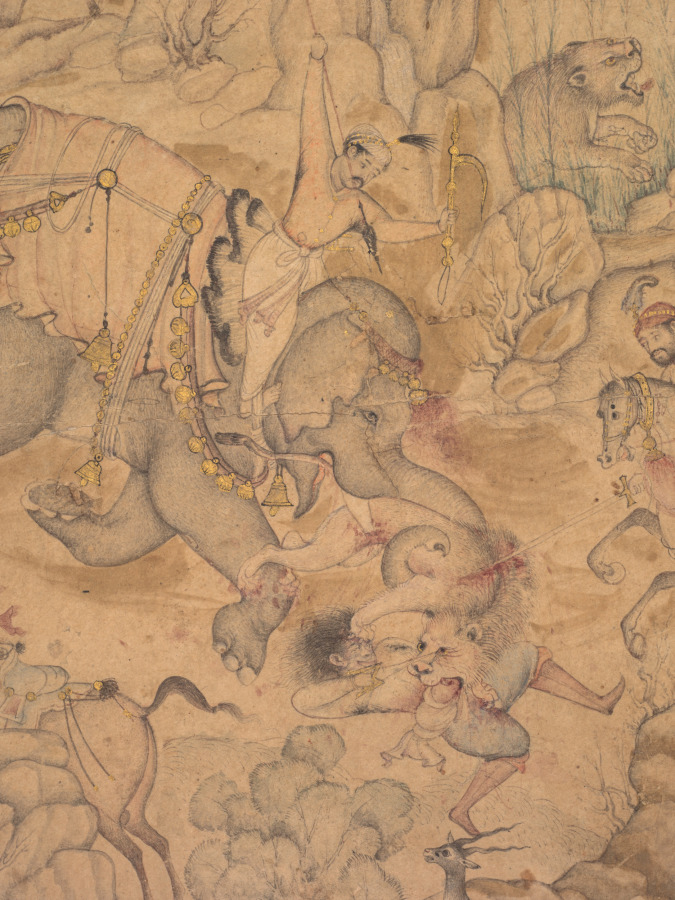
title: Princes hunting in a rocky landscape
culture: India, Mughal, 16th century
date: c. 1580–85; borders added c. 1700s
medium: Ink, slight color, and gold on paper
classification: Painting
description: The subdued palette of this tinted drawing belies the dire events of the scene. A group of Mughal nobles out hunting with falcons has chanced upon two lions in the wilderness, and one of the men has been attacked. The bearded figure with the falcon at the upper left and the huntsman about to retrieve a duck caught by one of the trained falcons at the lower left are reminiscent of an earlier work, Hunting with Falcons in a Landscape (CMA 2013.292), painted by a Persian artist. By the time this painting was made Akbar exerted more direct influence on his artists’ work, and it reveals his taste for dramatic action and climactic moments where life and death hang in the balance.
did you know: A hunter with gunpowder pouch hurriedly loads a musket with a scouring stick.